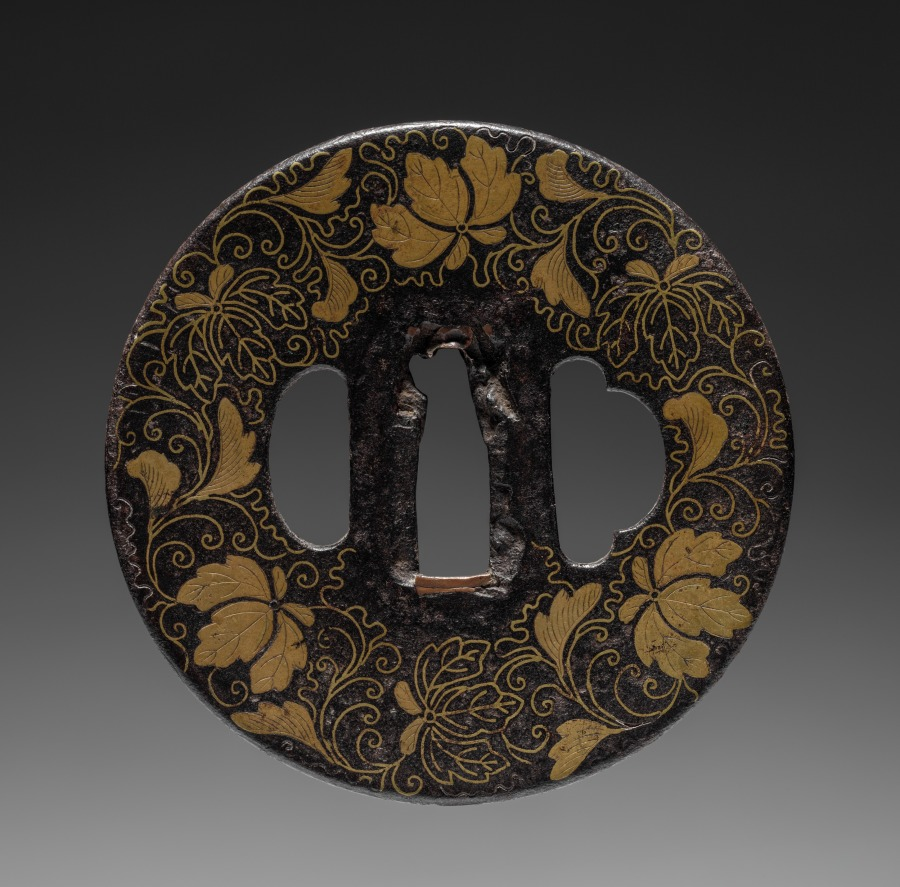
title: Sword Guard (Tsuba)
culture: Japan, possibly Edo period (1615-1868)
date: c. 1615–1868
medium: iron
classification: Arms and Armor